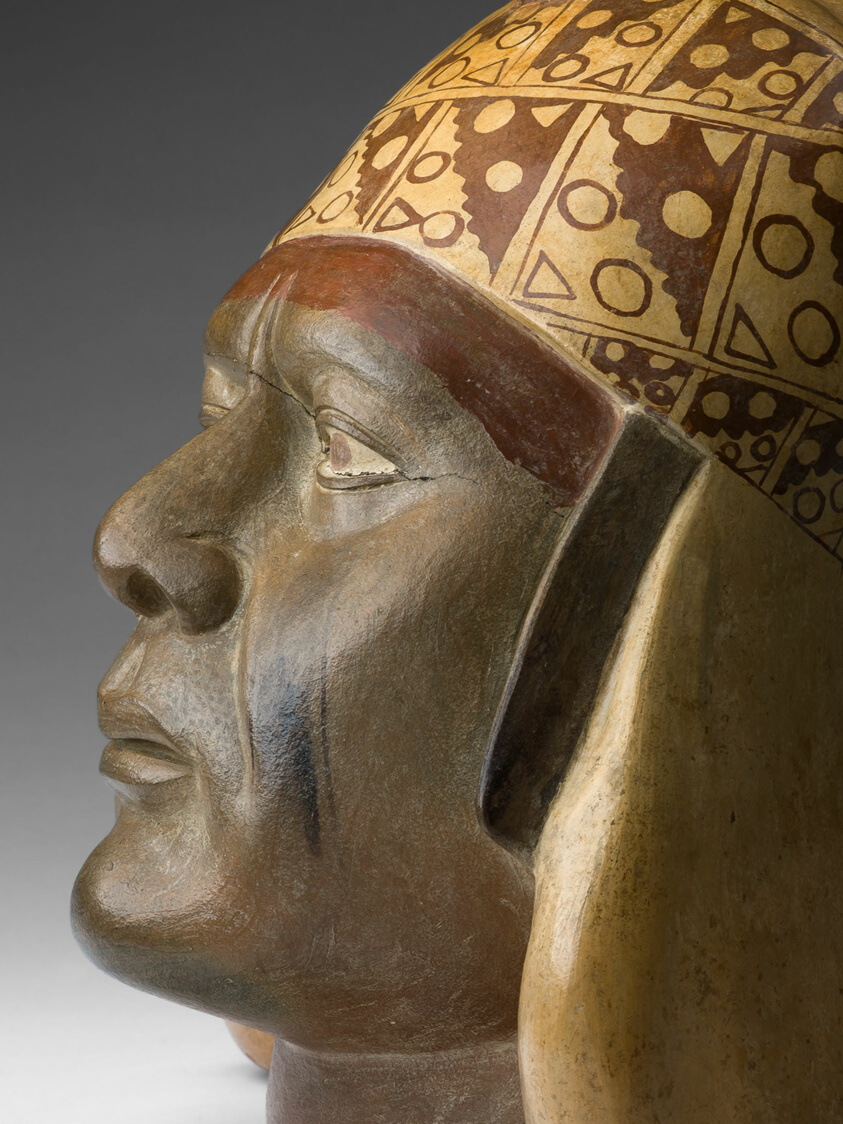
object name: Vessel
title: Portrait Vessel of a Ruler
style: moche, mochica v, mochica, early intermediate period, Pre-Columbian, americas, andes, Arts of the Americas, andean, south american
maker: Moche (North coast, Peru)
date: 100 BCE–500 CE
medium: Ceramic and pigment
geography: Peruvian North Coast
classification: ceramics; earthenware; art of the americas; vessel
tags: people, men, indigenous, red (color), geometric, heads, headwear, portraits, headdresses, rulers (people)